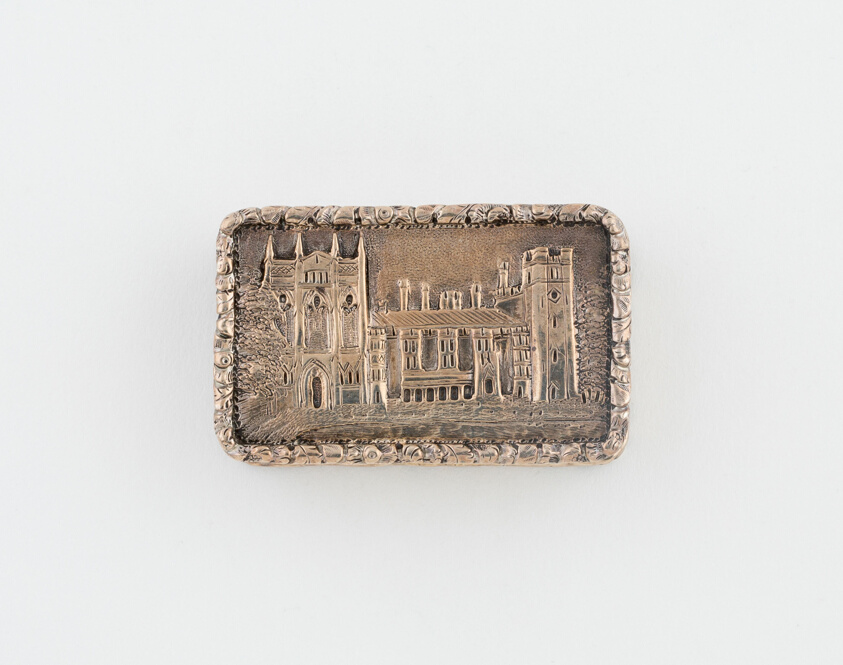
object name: Metalwork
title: Vinaigrette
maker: Taylor and Perry; Birmingham, England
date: 1835/36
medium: Silver and silver gilt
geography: Birmingham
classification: container for personal use; vinaigrette (container for health care); european decorative arts; metalwork; silver; decorative object/ornament